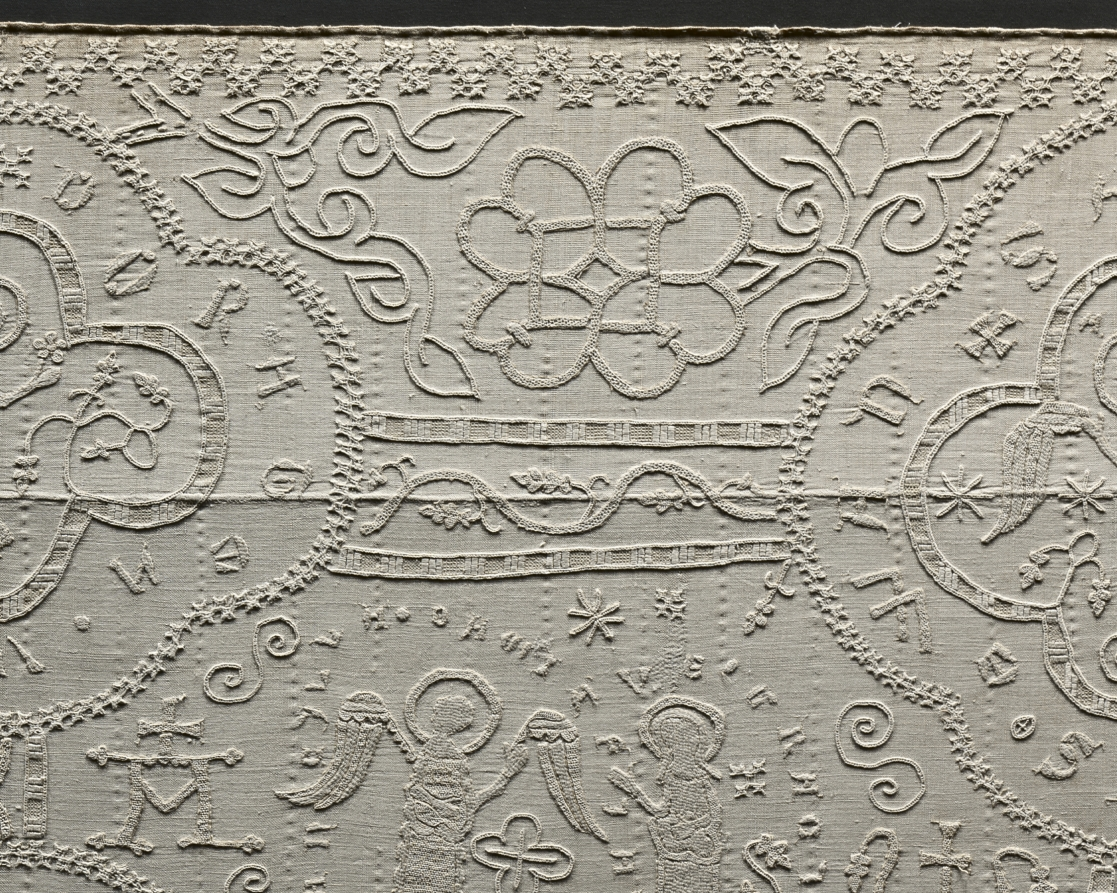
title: Altar Cloth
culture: Germany, Altenberg on the Lahn, Premonstratensian Convent, 14th century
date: c. 1350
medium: embroidery: linen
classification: Embroidery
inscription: various motifs enclosed in quatrefoils with identifying inscriptions in Gothic letters.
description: This large, embroidered altar cloth is one of the rarest, most important medieval church furnishings in existence. It was stitched by nuns in the Premonstratensian Convent in Altenberg on the Lahn River, north of Frankfurt, Germany, and was used to cover the church’s high altar in the weeks leading up to Easter. The cloth is an example of linen embroidery, a specialty of German nuns in the later Middle Ages. The Altenberg monastery church once had valuable furnishings; the high altar retable (a decorated frame with sculptures and paintings on the top of an altar) has survived, the main parts of which are now in the Städel Museum in Frankfurt, Germany.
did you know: When lit from behind, the previously hidden details emerge and the complex design becomes evident.